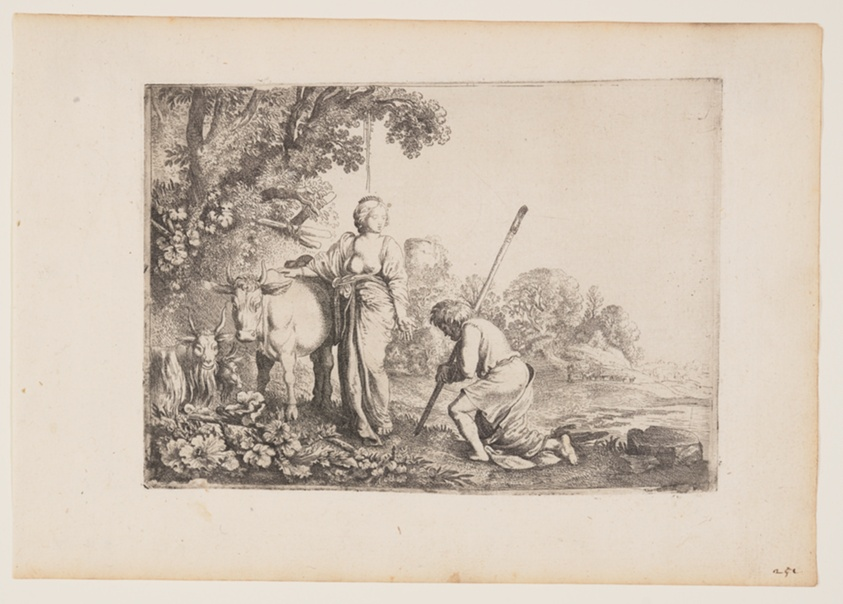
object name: Print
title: Juno Delivering Io, plate 1 from The Story of Mercury and Argus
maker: Moses van Uyttenbroeck (Dutch, c. 1595–before 1647)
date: c. 1620-26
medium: Etching on ivory laid paper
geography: Netherlands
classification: etching; paper; print; prints and drawing